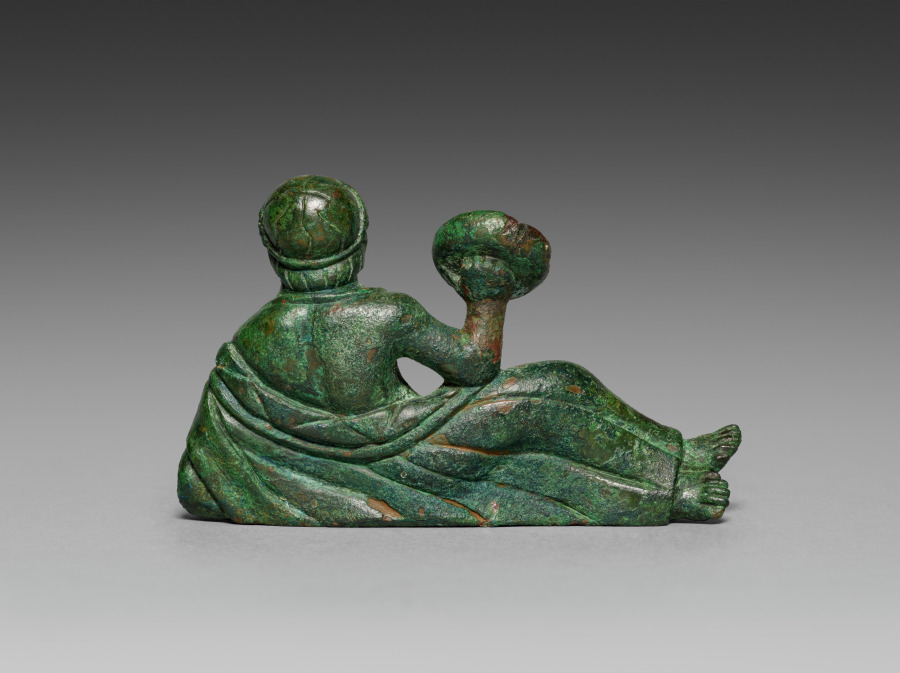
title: Vessel Ornament of Banqueter Holding an Omphalos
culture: Etruscan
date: probably 400–375 BCE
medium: bronze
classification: Sculpture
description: This bronze banqueter figurine was one of six once adorning the rim of a large basin, now lost. Cast in molds with individualized details, most have grooves on their underside to attach to the basin. Minute traces of gilding remain on areas of clothing and skin (mostly visible only under magnification), suggesting that they may have been completely gilded. Two handles in the form of hippocampi, horses with serpentine tails, also belonged to the basin and are now displayed at the Michael C. Carlos Museum at Emory University. The basin may have been used to hold liquid for a banquet, or was perhaps funerary. This bronze figurine holds a phiale mesomphalos, a shallow wine bowl, in his right hand. The vessel is tilted upward as if to spill its contents, perhaps as a libation for the gods. Traces of gilding remain in the corners of the phiale mesomphalos and the figurine’s drapery. His left hand rests against a fold of cloth slipping over his shoulder. A garland lies on his bare chest and another crowns his head. The banqueter shares many similarities with 1987.158.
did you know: Though primarily associated with dedicatory libations, the phiale mesomphalos could also be used for drinking.